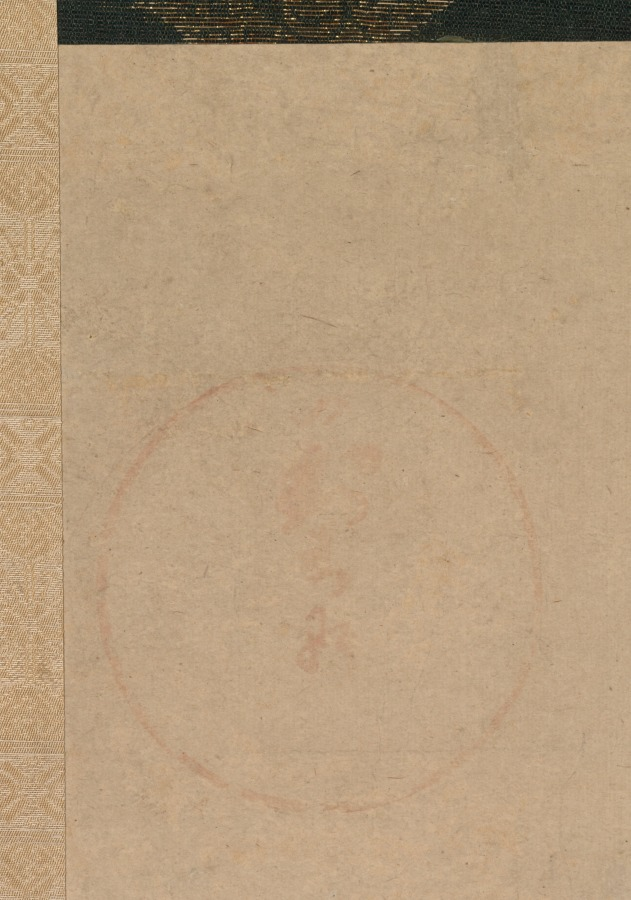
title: Puppy with Dandelions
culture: Japan, Edo period (1615–1868)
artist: studio of Tawaraya Sōtatsu (Japanese, c. 1570–c. 1640)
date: 1600–1640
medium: hanging scroll; ink on paper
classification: Painting